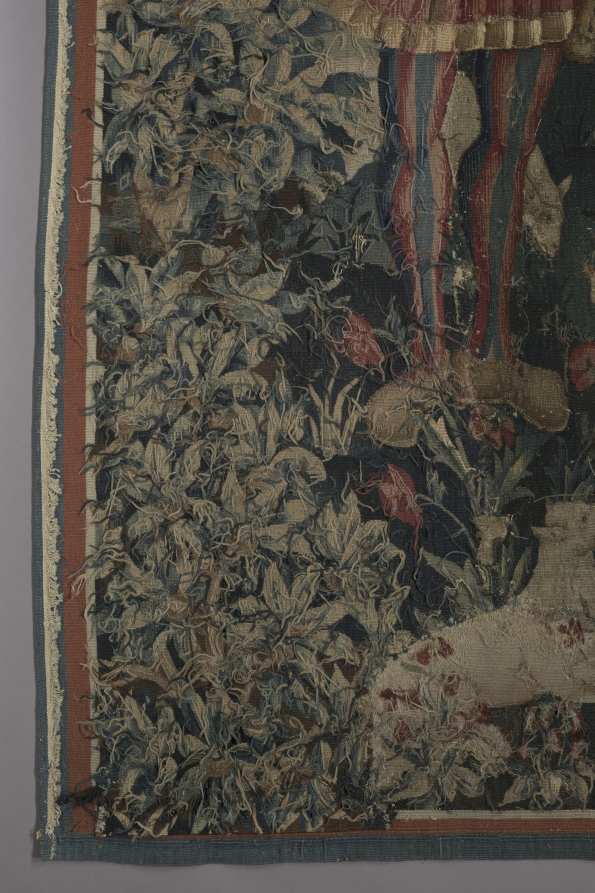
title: Shepherds in a Round Dance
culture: Netherlands, early 16th century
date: around 1500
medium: Wool and silk: tapestry weave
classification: Tapestry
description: Late medieval tapestries often use a limited yet contrasting color palette to portray stylized images. The expressions of these figures, for example, are conveyed more by their postures than by their faces. Four shepherds and shepherdesses join hands and dance to the music of a bagpiper at the far right, while a lord and two ladies on the left look on. A dog and sheep amid blossoming plants and trees contribute to the festive pastoral scene in front of a castle.